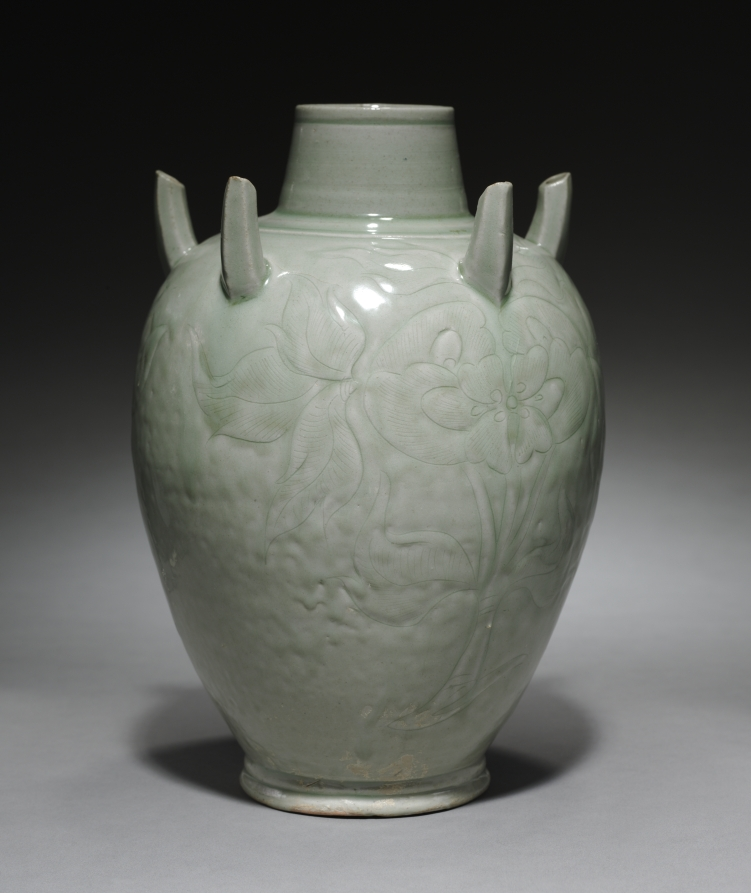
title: Vase with Peonies and Five Spouts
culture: China, Zhejiang province, Hangzhou, Southern Song dynasty (1127-1279)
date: 900s–1000s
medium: green-glazed porcelaneous stoneware with incised decoration, Yue ware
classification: Ceramic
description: "In full autumn wind and dew the kilns of Yue open; And a thousand peaks are despoiled of their halcyon green" (translated by S. W. Bushell). These 9th-century poetic lines glorify the highly prized green-glazed Yue wares of the Tang period. This later example has a pale green glaze that is glassy and consistent, which indicates a precise control of the glaze components as well the kiln atmosphere by reducing the amount of oxygen at some stage during the firing.